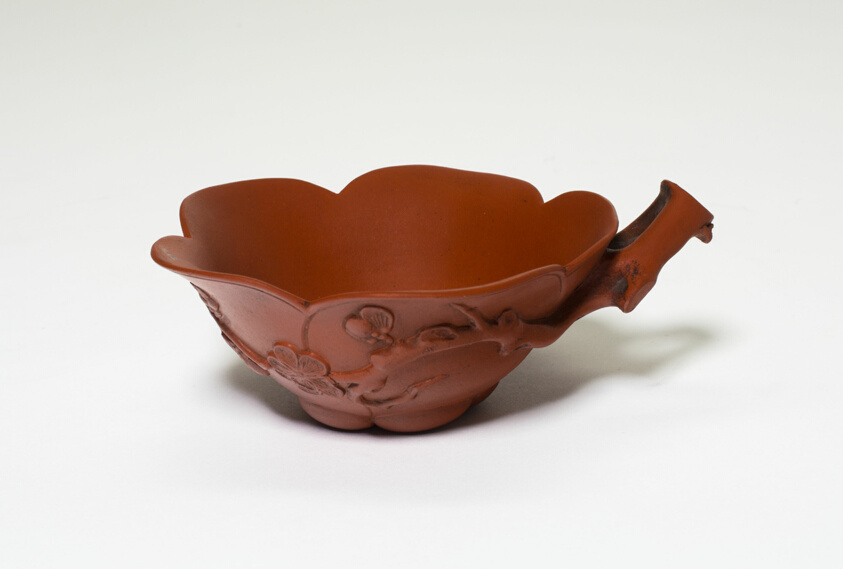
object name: Vessel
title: Cup in the Shape of a Plum Flower with Branch-Shaped Handle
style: Chinese (culture or style)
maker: China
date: Ming dynasty (1368–1644)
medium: Yixing stoneware with underglaze molded decoration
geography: China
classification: drinking vessel; asian art; ceramics; vessel